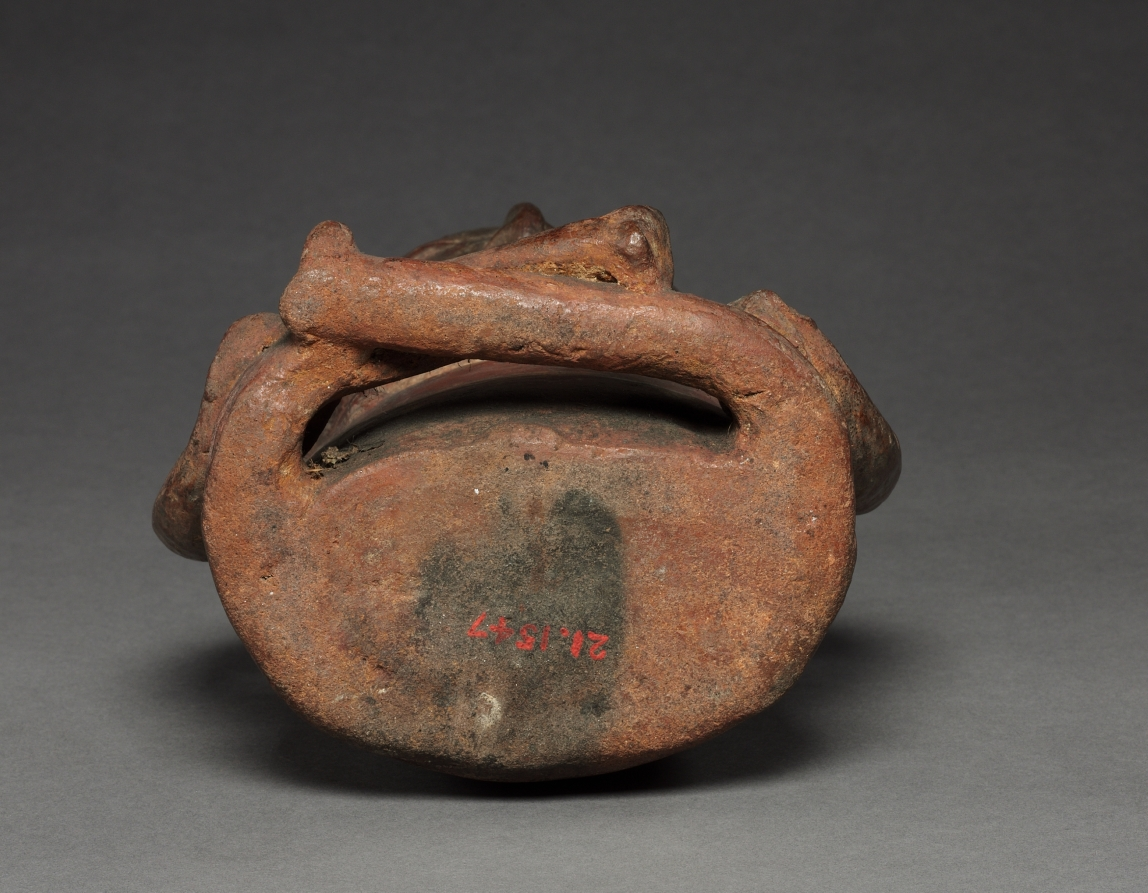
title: Seated Figure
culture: Colombia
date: before 1921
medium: red ware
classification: Ceramic